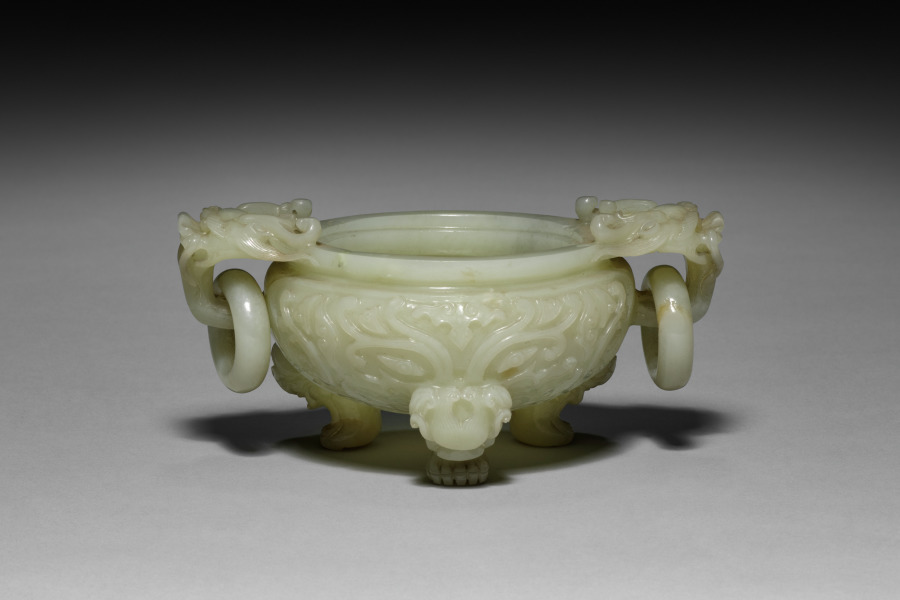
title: Tripod Incense Burner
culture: China, Qing dynasty (1644-1911)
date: 1644–1911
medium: jade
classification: Jade